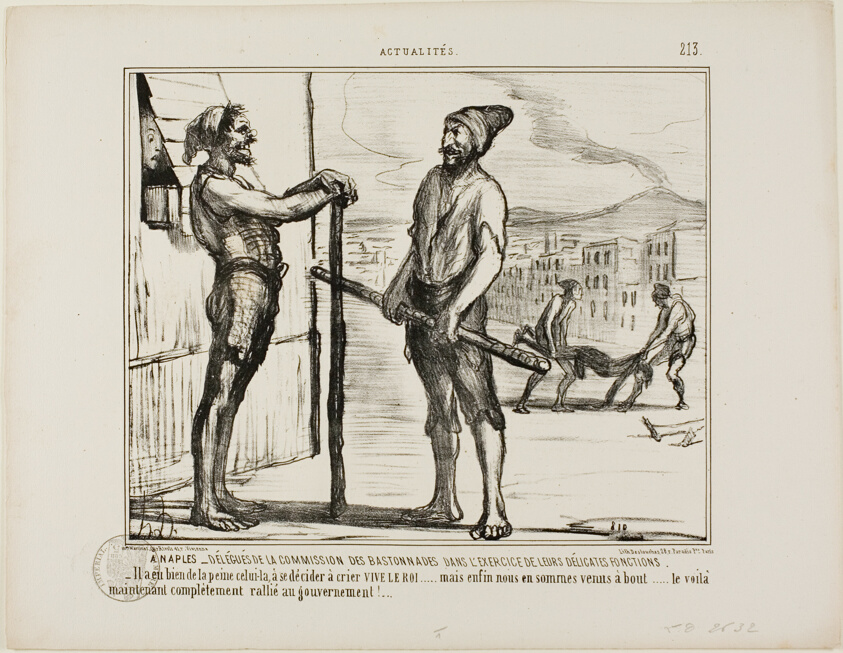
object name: Print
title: It Naples. - The Commission of Bastonnades During Their Delicate Job. “- It took a while to convince this one to yell: "LONG LIVE THE KING!"... but finally we got to the bottom... and now he is completely in favour of the Government..,” plate 213 from Actualités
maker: Honoré Victorin Daumier; French, 1808-1879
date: 1855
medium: Lithograph in black on white wove paper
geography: France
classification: lithograph; print; prints and drawing